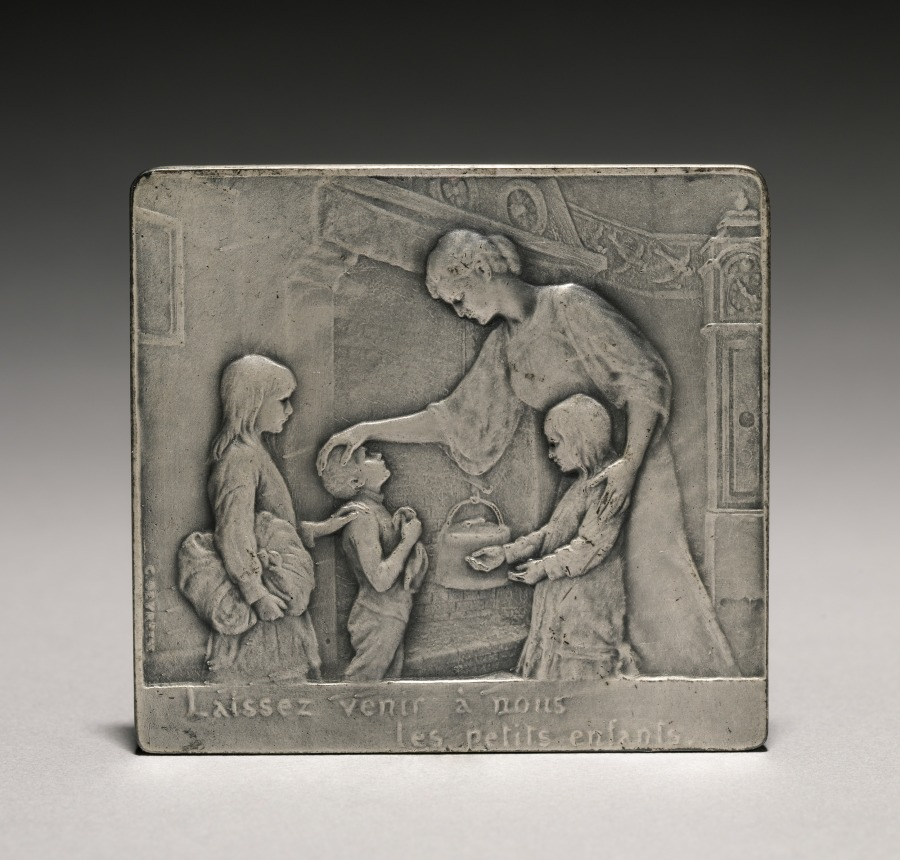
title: Plaquette (obverse)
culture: Belgium, 20th century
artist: Godefroid Devreese (Belgian, 1861–1941)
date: 1900s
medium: bronze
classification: Metalwork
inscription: "Laissez venir à nous les petits enfants."